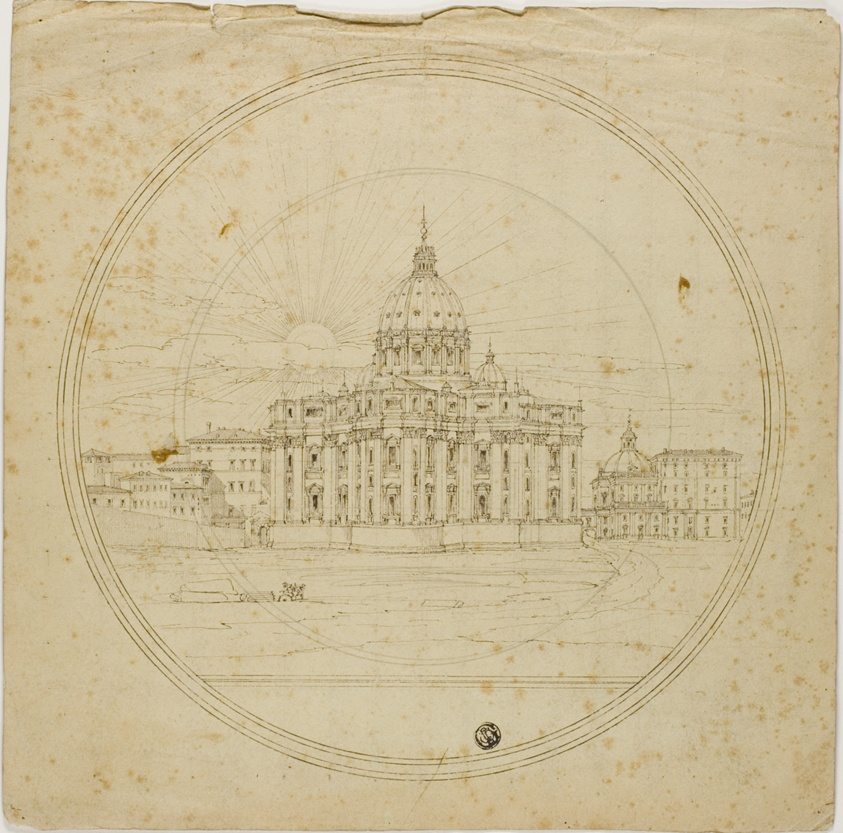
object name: Drawing and Watercolor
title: Exterior View of Apse, Saint Peter's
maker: Liévin Cruyl (Flemish, 1634-1720)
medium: Pen and brown ink, with graphite, on cream wove paper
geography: Flanders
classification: pen and ink drawings; drawings (visual works); prints and drawing